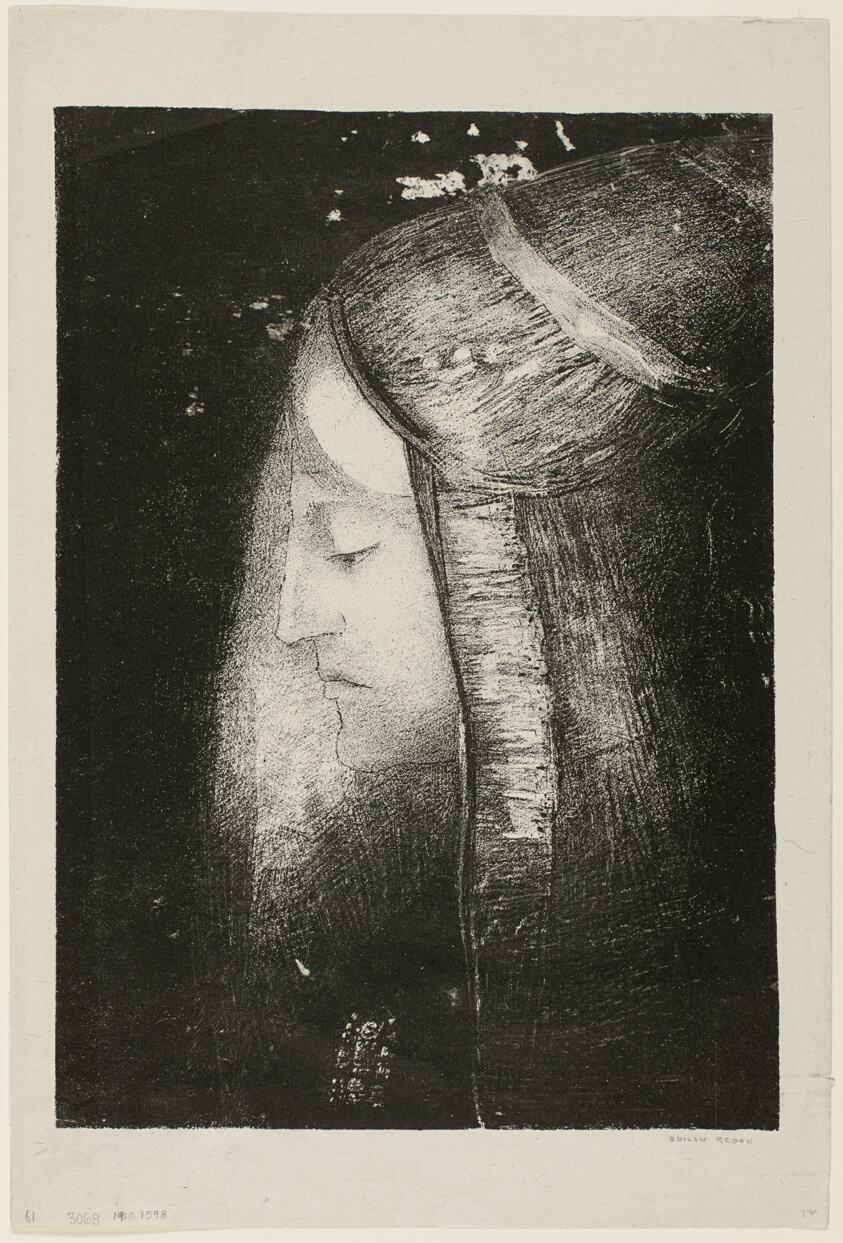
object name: Print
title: Profile of Light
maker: Odilon Redon (French, 1840-1916)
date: 1886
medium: Lithograph in black on light gray chine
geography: France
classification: lithograph; print; prints and drawing; paper